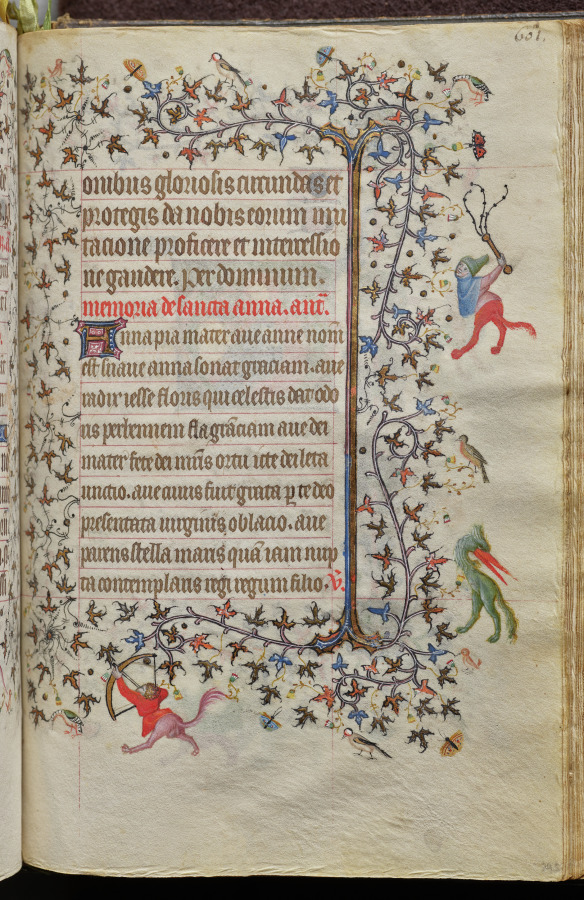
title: Hours of Charles the Noble, King of Navarre (1361-1425): fol. 294rv, Text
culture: France, Paris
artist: Master of the Brussels Initials and Associates (French)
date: c. 1405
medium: ink, tempera, and gold on vellum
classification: Bound Volume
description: This precious volume was obviously highly prized by its owner, the French-born King of Navarre, who had his coat of arms painted on no less than twenty folios. Rather than directly commissioning this manuscript from a specific workshop, it seems that Charles the Noble acquired his book of hours -- perhaps ready-made for the luxury market -- while on a trip to Paris in 1404-05. A collaborative effort, six painting styles are evidenced within the pages of this codex, those of two Italians, two Frenchmen, and two Netherlanders. The painter who was responsible for the planning and decoration of the book, and who produced seventeen of the large miniatures, was a Bolognese artist known as the Master of the Brussels Initials. His principal assistant, responsible for most of the borders, was a Florentine who signed his name "Zecho" da Firenze on folio 208 verso.